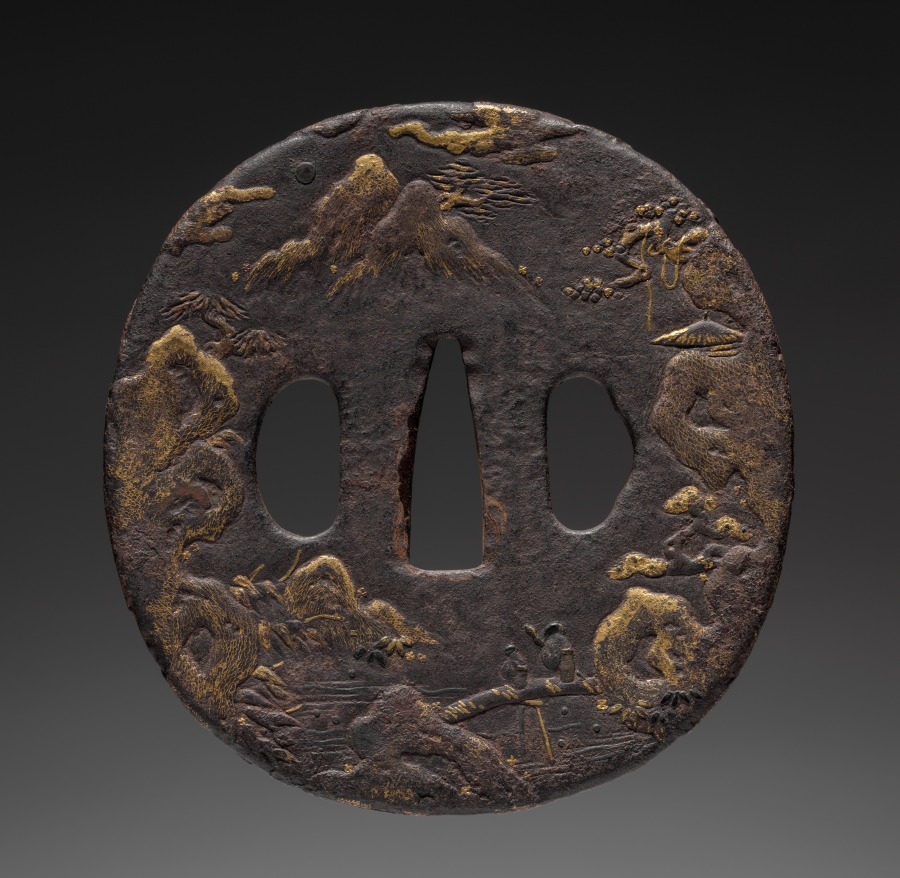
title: Sword Guard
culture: Japan, Edo period (1615–1868)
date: late 1700s-early 1800s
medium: iron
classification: Arms and Armor